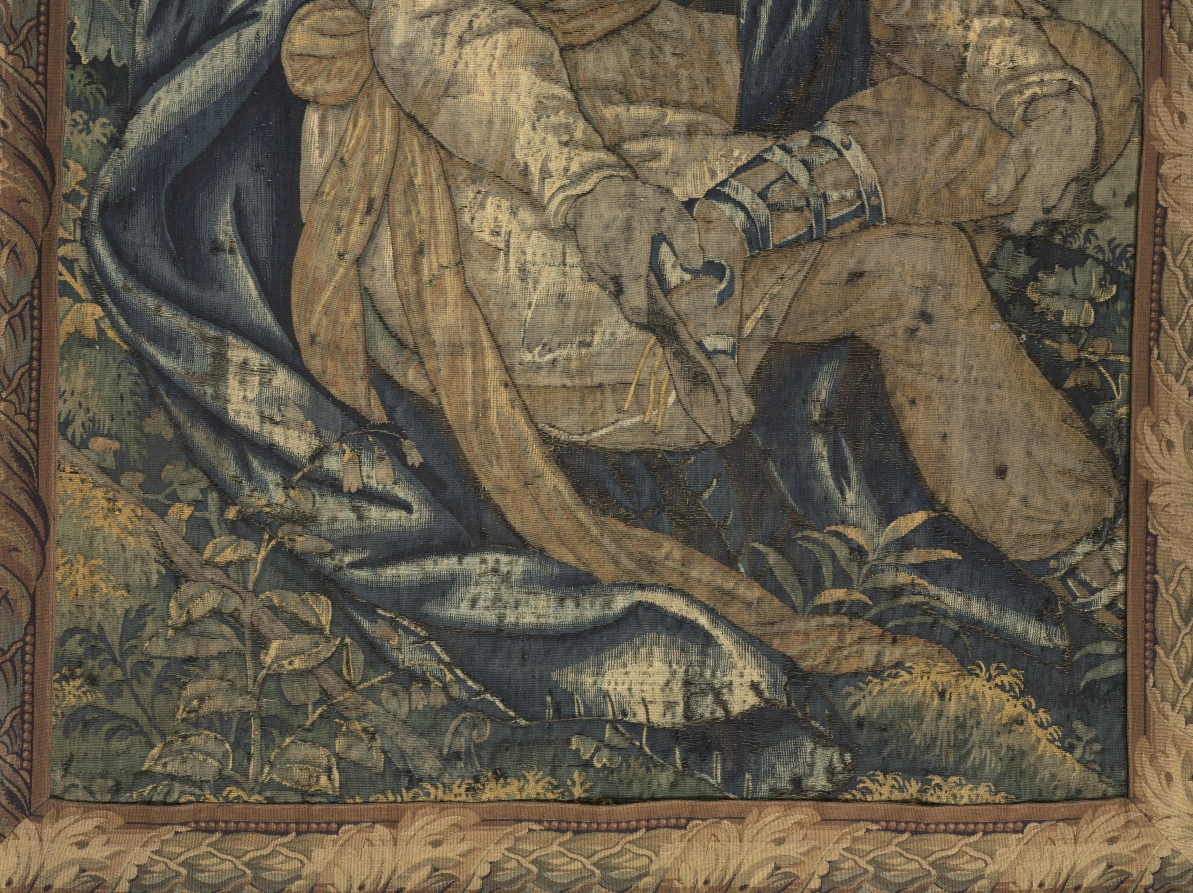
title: Moses and Jethro's Daughter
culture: Flanders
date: 1600s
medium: Wool: tapestry weave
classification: Tapestry